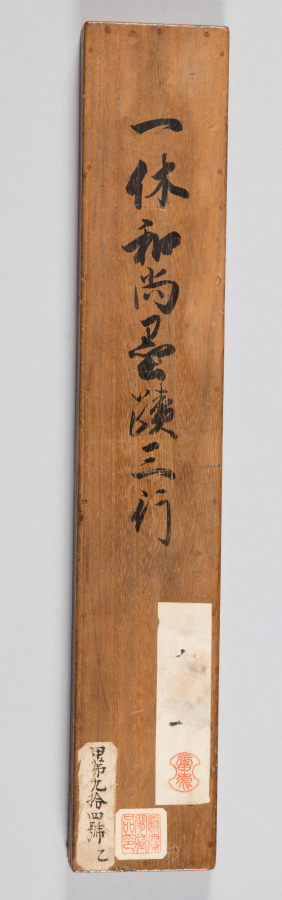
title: Reflections of Priest Foyen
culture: Japan, Muromachi period (1392–1573)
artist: Ikkyū Sōjun (Japanese, 1394–1481)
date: 1400s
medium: hanging scroll, ink on paper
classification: Painting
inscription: signed: "Kido nanasei son, Ikkyūshi Sōjun sho (Written by Ikkyū Sōjun, the seventh generation of Kido)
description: Left by his mother at a small Zen temple in Kyoto at the age of six, Ikkyu later drew on his early studies and experiences for his writings, which focused on his keen interest in the Chinese classics. Poetry in particular was a favorite subject and images from classical poetry or passages from favorite poems or commentaries frequently provided Ikkyu with the core ideas for his own work. A rare example of his calligraphy, this narrow scroll contains a verse in eight phrases, each comprising four characters. The whole verse is organized in three towering lines of brusque, emphatic calligraphy augmented by Ikkyu's signature-the two lines of running script in the lower left corner. The text refers to a passage included in the Chronicle of the Zen Sect that contains a cautionary reminder attributed to the legendary Chinese monk Foyen Qingyuan (1067-1120), long revered in Japan. The initial phrase begins: "Life is a mirage."